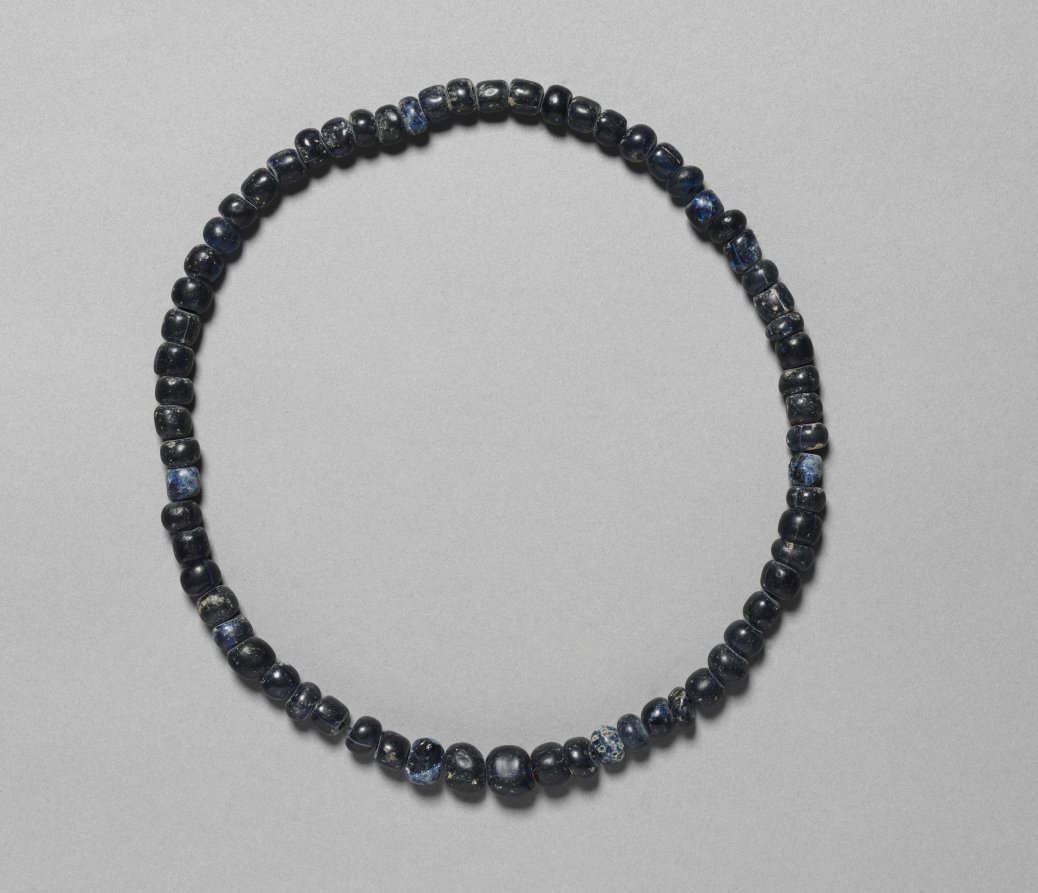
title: String of Glass Beads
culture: Korea, Three Kingdoms period (57 BCE–668 CE)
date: 400s CE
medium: glass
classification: Jewelry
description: An enormous amount of beaded strings and necklaces were excavated from Silla tomb sites. Glass, largely produced in ancient Rome since the late 1st century, also reached the Korean peninsula through the Silk Road, the ancient global trade route. Yet the cobalt blue glass beads shown in this string are highly likely to be soda glass produced in the Silla territory.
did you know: Glass, largely produced in ancient Rome since the late 1st century, also reached the Korean peninsula through the Silk Road, the ancient global trade route. The Silla people started to produce native soda glass as early as the 2nd century.